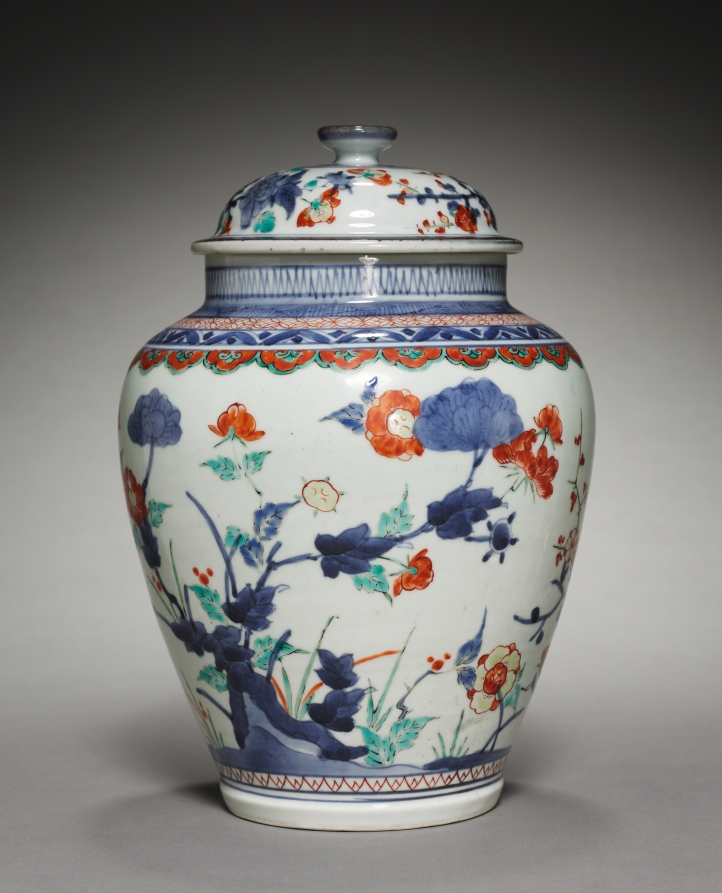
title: Covered Jar with Chrysanthemums, Peonies, and Plum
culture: Japan, Edo period (1615–1868)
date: late 1600s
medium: porcelain with underglaze blue and overglaze color enamel (Hizen ware, Kakiemon type)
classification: Ceramic